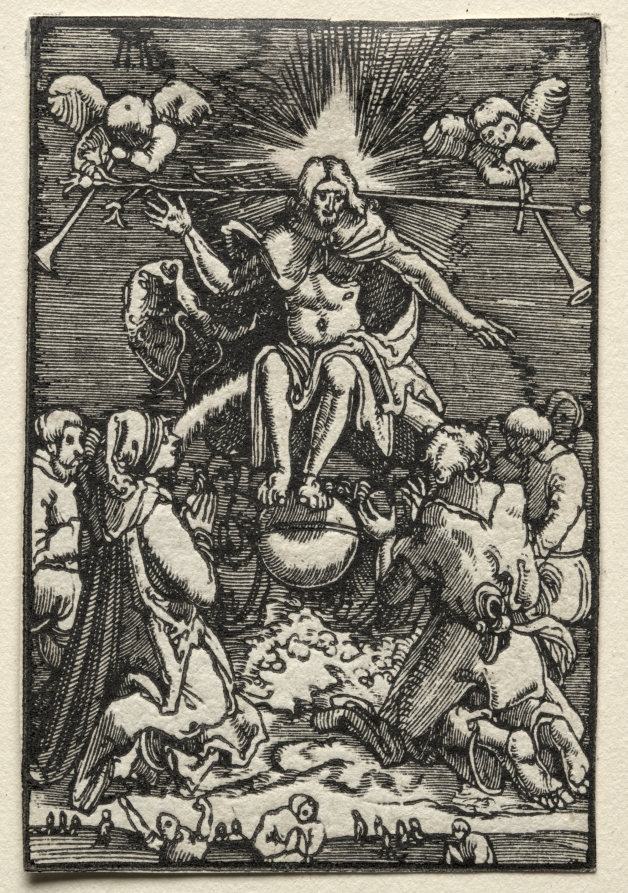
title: The Fall and Redemption of Man: The Last Judgment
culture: Germany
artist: Albrecht Altdorfer (German, c. 1480–1538)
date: c. 1515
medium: woodcut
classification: Print